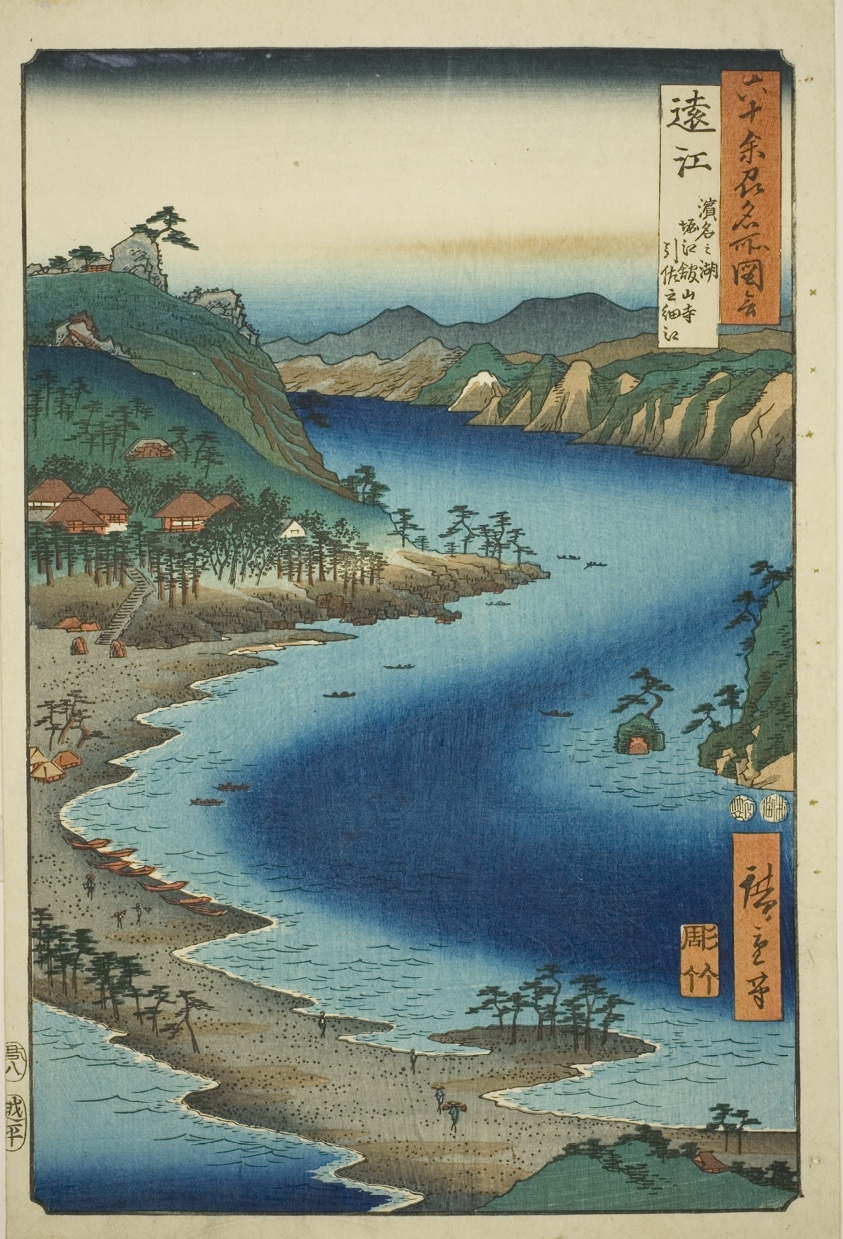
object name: Print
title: Totomi Province: The Narrow Inlet of Inasa near Kanzan Temple on Hamana Lake at Horie (Totomi, Hamana no umi, Horie Kanzanji, Inasa no hosoe), from the series "Famous Places in the Sixty-odd Provinces (Rokujuyoshu meisho zue)"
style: Japanese (culture or style)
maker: Utagawa Hiroshige 歌川 広重; Japanese, 1797-1858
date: 1853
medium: Color woodblock print; oban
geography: Japan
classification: woodblock print; print; asian art